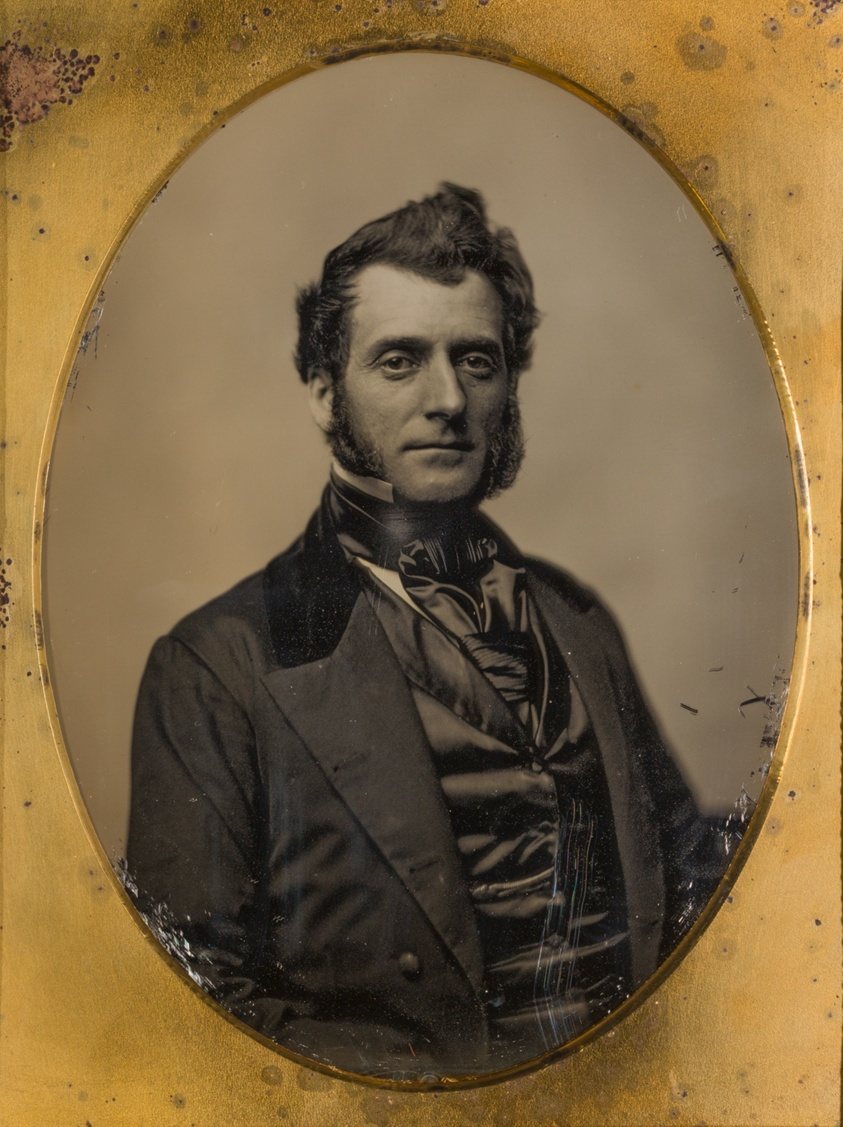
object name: Photograph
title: Untitled (Portrait of a Man)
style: 19th century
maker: Artist unknown; Probably American, 19th century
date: 1839/60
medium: Daguerreotype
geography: United States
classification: portrait; daguerreotype; photograph; portrait; photography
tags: portraits, portraits: male subject